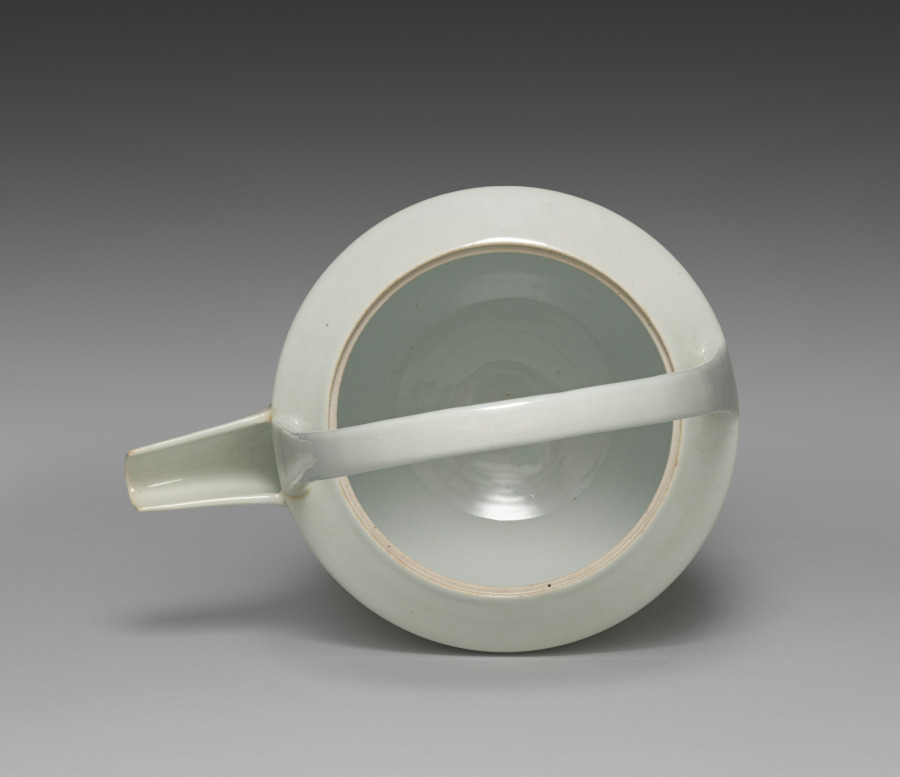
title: Sake Pourer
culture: Japan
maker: Seifū Yohei III (Japanese, 1851–1914)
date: c. 1887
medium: Porcelain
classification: Ceramic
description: This sake pourer has a wide basin with a low foot; a generous spout open across the top half; a flat, round lid with a small knob recessed flush to the top of the container; and a tall, arched handle that meets the container where the top joins the basin at a sharp angle. This vessel is glazed but otherwise undecorated. Unlike the creamy white color of some Yohei III works, the white of this sake pourer has the bluish cast typical of porcelains produced in Kyoto.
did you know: Seifū Yohei III signed this sake pourer in underglaze blue on the base.